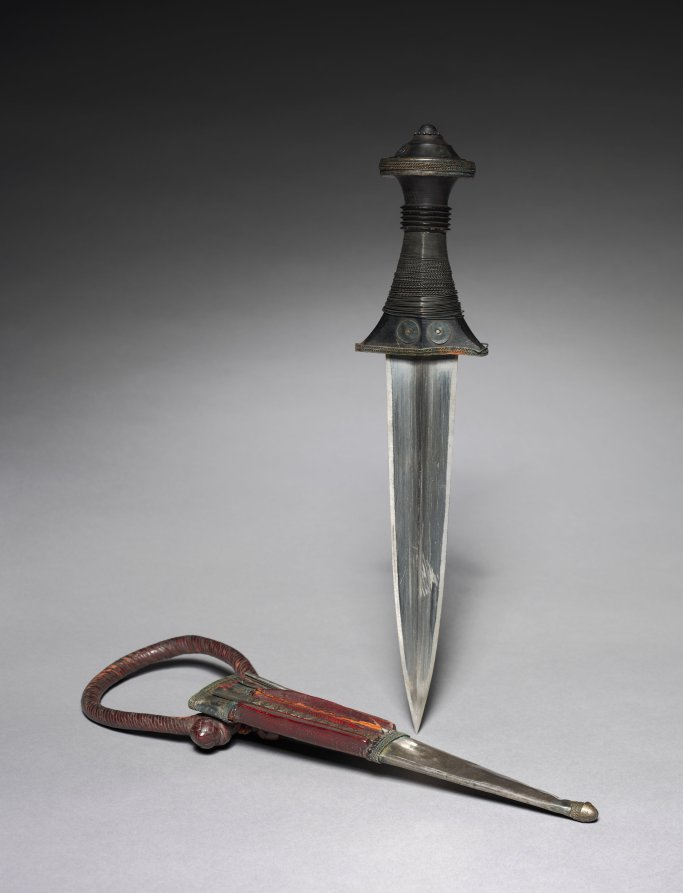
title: Dagger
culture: Africa, East Africa, Sudan, unknown maker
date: 1880–1910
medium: metal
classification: Arms and Armor